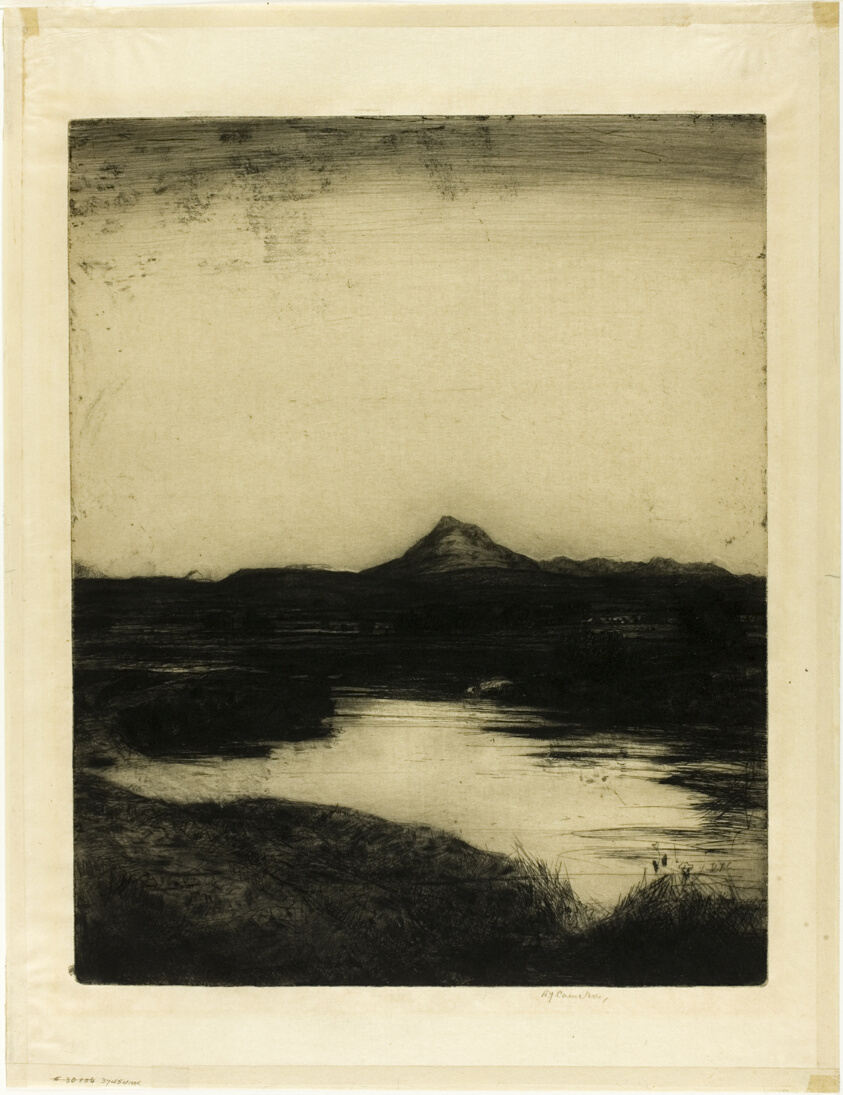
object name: Print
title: Ben Ledi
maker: David Young Cameron (Scottish, 1865-1945)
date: 1911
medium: Drypoint, with etching and plate tone, on cream Japanese paper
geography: Scotland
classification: etching; print; prints and drawing